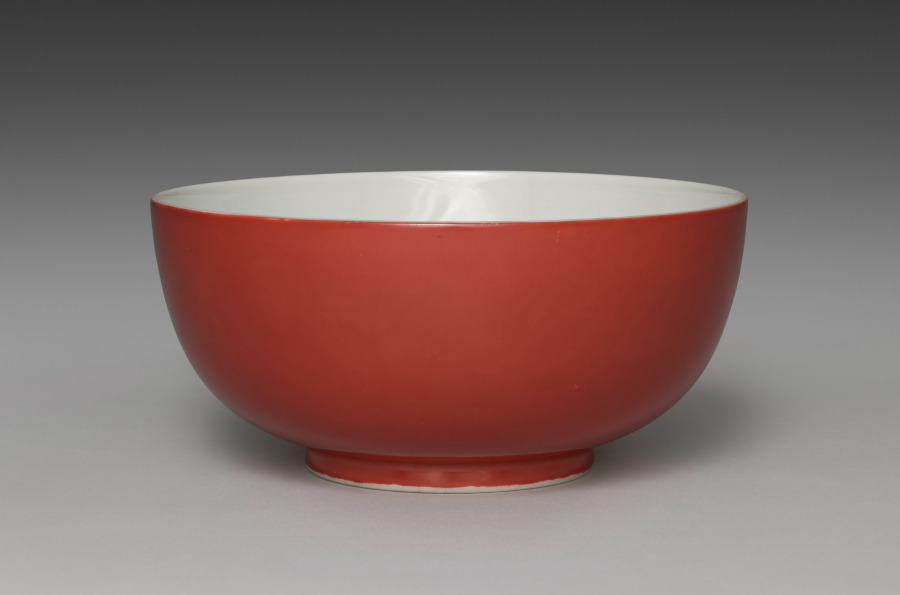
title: Sweets Bowl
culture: Japan, Taishō period (1912–26) or Shōwa period (1926–89)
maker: Seifū Yohei IV (Japanese, 1872–1951)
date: 1914–46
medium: Porcelain with coral red glaze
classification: Ceramic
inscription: 清風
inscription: 成山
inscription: 清風造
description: Like his father, Yohei IV also produced works with red monochrome glazes, like this red coral–glazed sweets bowl with white interior.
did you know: Seifū Yohei IV was active at home and abroad and won international recognition for his ceramic's glazes and designs.